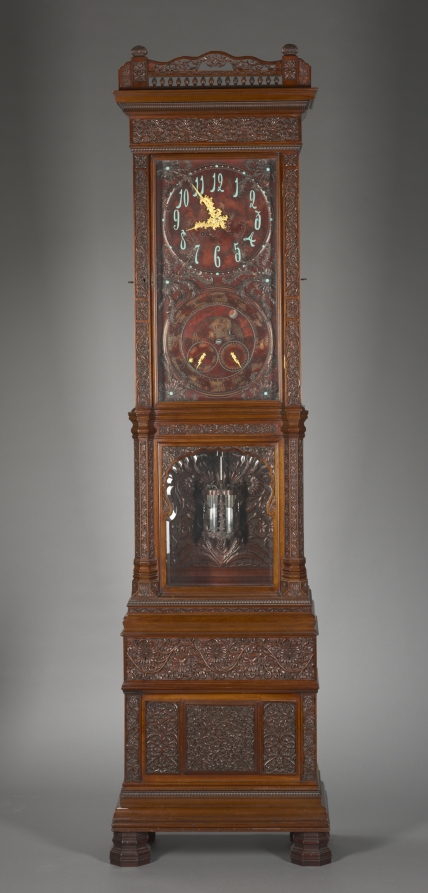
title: Tall Clock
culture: America, New York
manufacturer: Tiffany & Co. (America, New York, est. 1837)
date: c. 1880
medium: mahogany, teak with dial faces of gilded and patinated metal, glass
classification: Furniture and woodwork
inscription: lower dial face inscribed: Tiffany & Co., Makers.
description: In 1879, Louis Comfort Tiffany joined several other artisans to create an interior decoration firm called Associated Artists. The firm was very influential in advocating a rejection of historical styles in favor of the new fashion from more eclectic sources of inspiration, including the Islamic world and Japan. One of Tiffany's partners, Lockwood De Forest, traveled extensively in India to find carved wood and other decorative accessories that could be used in their designs. This clock's design was one result of this collaboration. The heavily carved panels on the clock were likely purchased in India during this time and assembled with a clock mechanism from Tiffany's father's shop, Tiffany and Co., whose name appears on the clock face.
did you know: Associated Artists assembled this clock using imported carved wood panels from India. For an American owner, the motifs suggested decorative styles from faraway places.